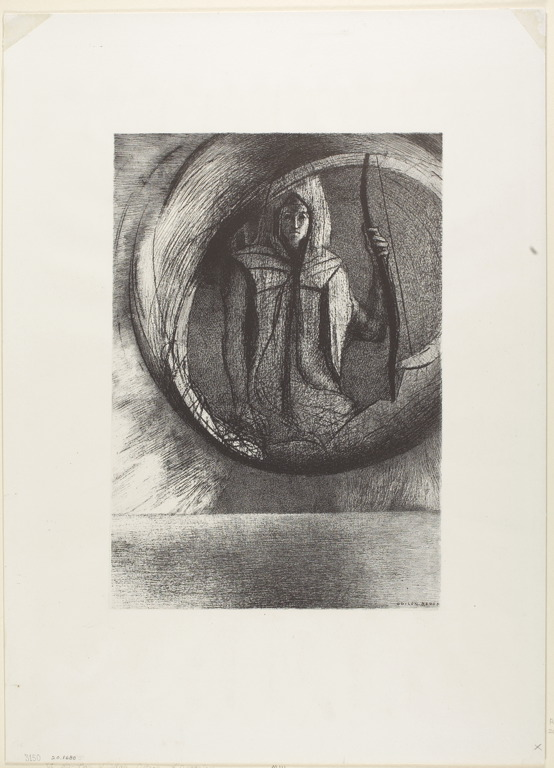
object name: Print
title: And Beyond, the Astral Idol, the Apotheosis, plate 2 of 6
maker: Odilon Redon (French, 1840-1916)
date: 1891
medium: Lithograph in black on ivory China paper laid down on off-white wove paper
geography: France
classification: lithograph; print; prints and drawing; paper